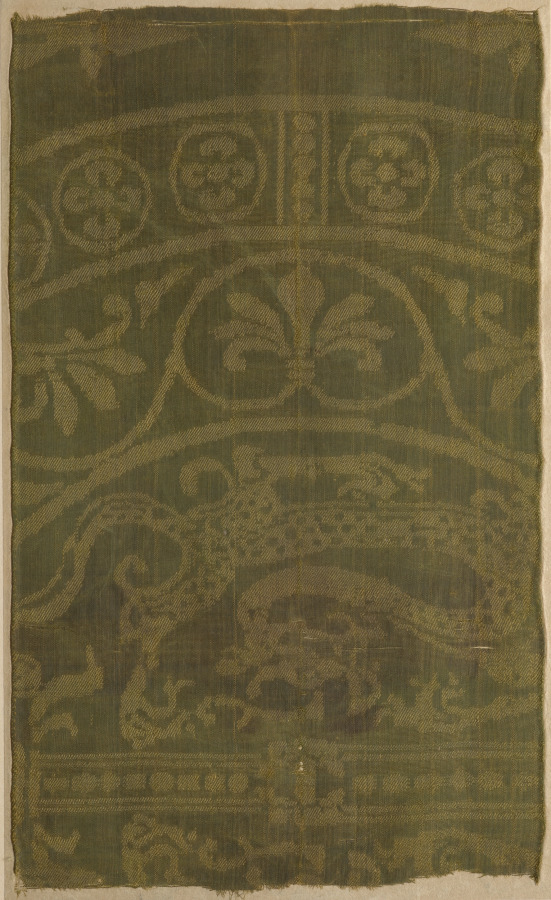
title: Fragment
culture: China, Tang dynasty (618-907)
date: 700s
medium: tabby ground and twill pattern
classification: Textile